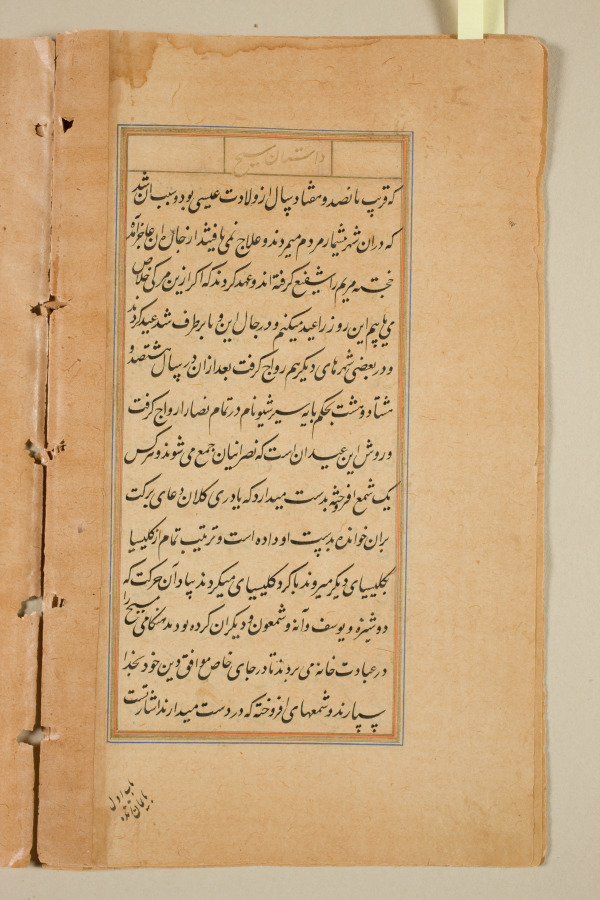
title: Text page from a Mirror of Holiness (Mir’at al-quds) of Father Jerome Xavier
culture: Mughal India, Allahabad, made for Prince Salim (1569–1627)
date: 1602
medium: Ink and gold on paper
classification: Manuscript